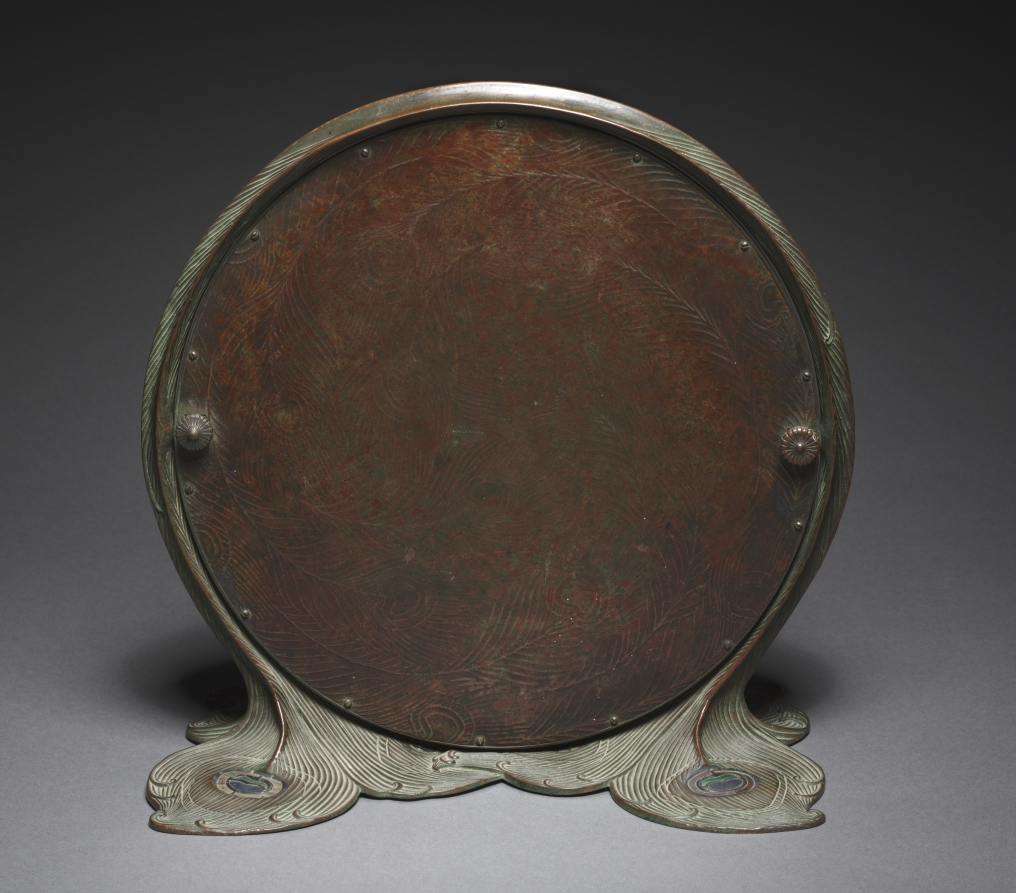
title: Dressing Table Mirror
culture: America, New York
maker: Tiffany Glass & Decorating Company (America, New York, 1892–1902)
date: c. 1900–1902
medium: bronze and Favrile glass mosaic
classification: Furniture and woodwork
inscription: stamped on underside: TGD Co. and illegible number [9292?]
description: By 1900 Louis Comfort Tiffany had expanded his empire by increasing the firm’s production of “fancy goods,” including inkstands, candlesticks, clocks, small boxes, desk sets, tea screens, and other functional objects, such as this dressing table mirror. These smaller, more affordable luxury items were designed with as much thought to artistry as the great stained glass windows and lamps through which the firm enjoyed unrivaled success.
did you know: The peacock, with its brilliantly colored iridescent plumage, was a favorite motif of Louis Comfort Tiffany, appearing in almost every genre of his artistic production.